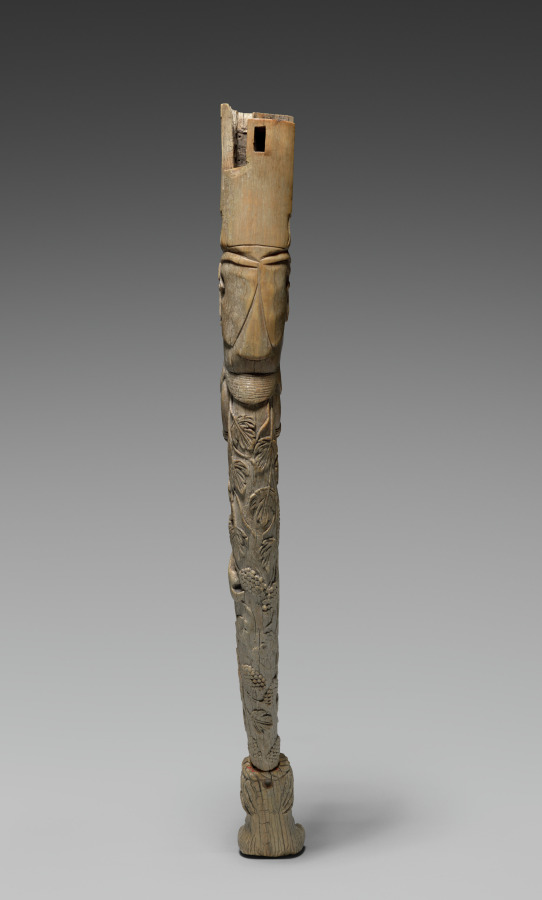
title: Chair Leg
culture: Afghanistan, Begram, Kushan period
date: 300s CE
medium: ivory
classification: Ivory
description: This ivory carving was made to sheath wooden furniture made in India for trade along the Silk Road, which stretched from Rome to China. Indian ivory-faced furnishings--along with lacquer boxes from China and painted glass from Rome--were found in an extraordinary deposit of luxury goods at a site called Begram. The wood on which the ivory and lacquer were affixed has long disintegrated, and only the small pieces remain.